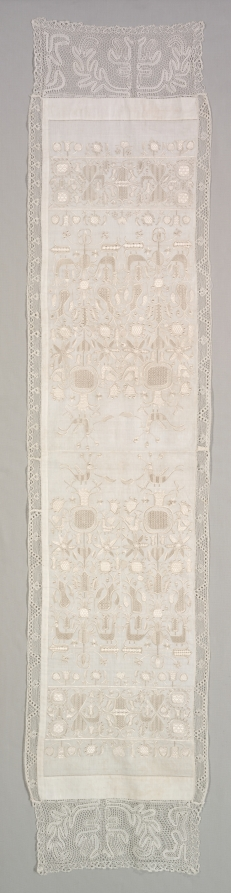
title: Lace Shawl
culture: Czechoslovakia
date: 1800s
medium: Linen: plain weave with bobbin lace and silk embroidery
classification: Embroidery